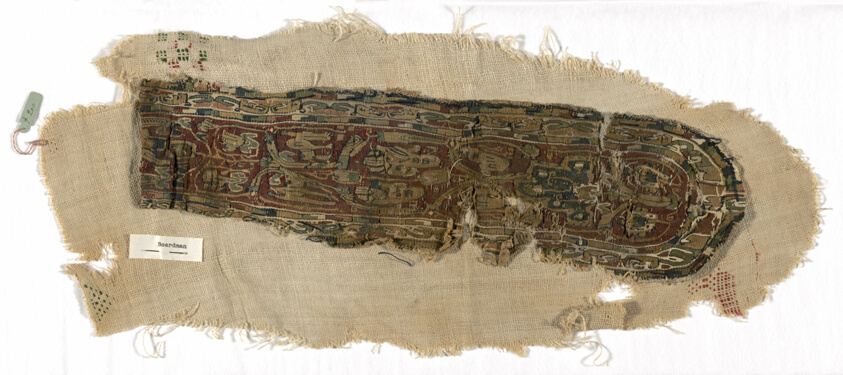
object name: Textile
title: Fragment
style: roman period (egyptian), coptic (period)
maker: Egypt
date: Roman period (30 B.C.– 641 A.D.)/Arab period (641–969)/Fatimid period (969–1171), 3rd/ 10th century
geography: Egypt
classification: textile; weaving